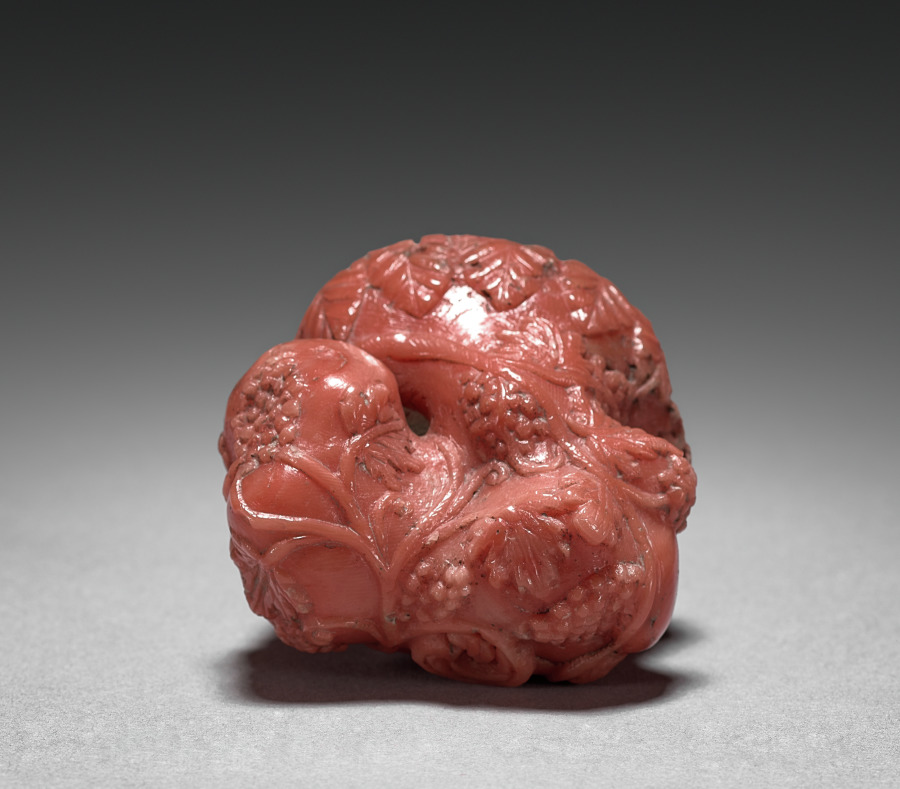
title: Sword Hilt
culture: Pakistan, Gandhara, Kushan period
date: c. 100s–200s CE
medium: coral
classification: Sculpture